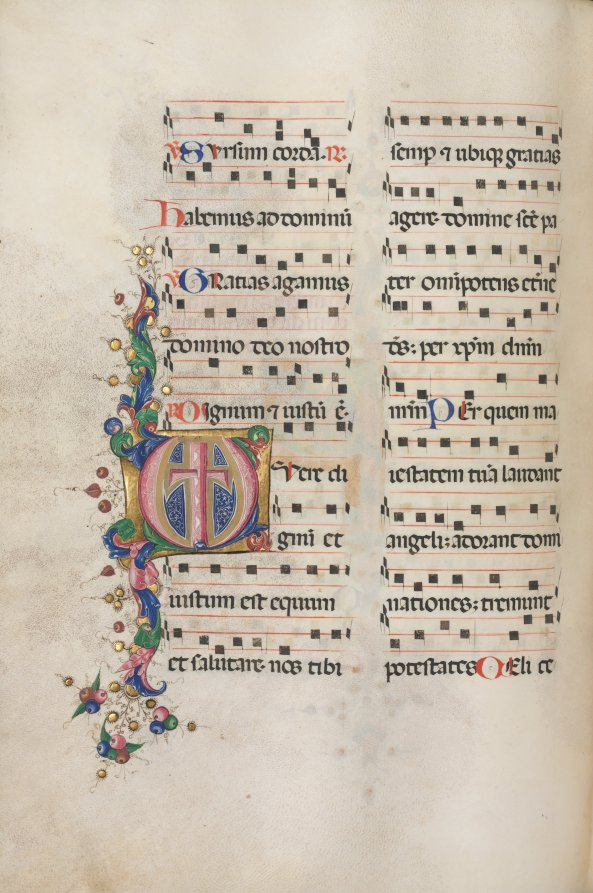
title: Missale: Fol. 183v: Cross, Foliage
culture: Italy, Perugia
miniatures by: Bartolommeo Caporali (Italian, c. 1420–1503)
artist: assisted by Giapeco Caporali (Italian, d. 1478)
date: 1469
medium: ink, tempera and burnished gold on vellum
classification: Bound Volume